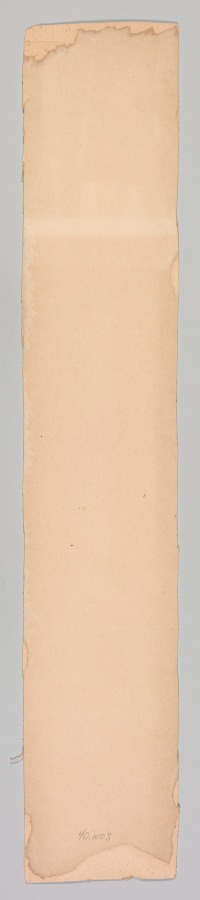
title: A Beauty in Spring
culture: Japan, Edo period (1615–1868)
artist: after Torii Kiyonaga (Japanese, 1752–1815)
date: 1752–1815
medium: color woodblock print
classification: Print